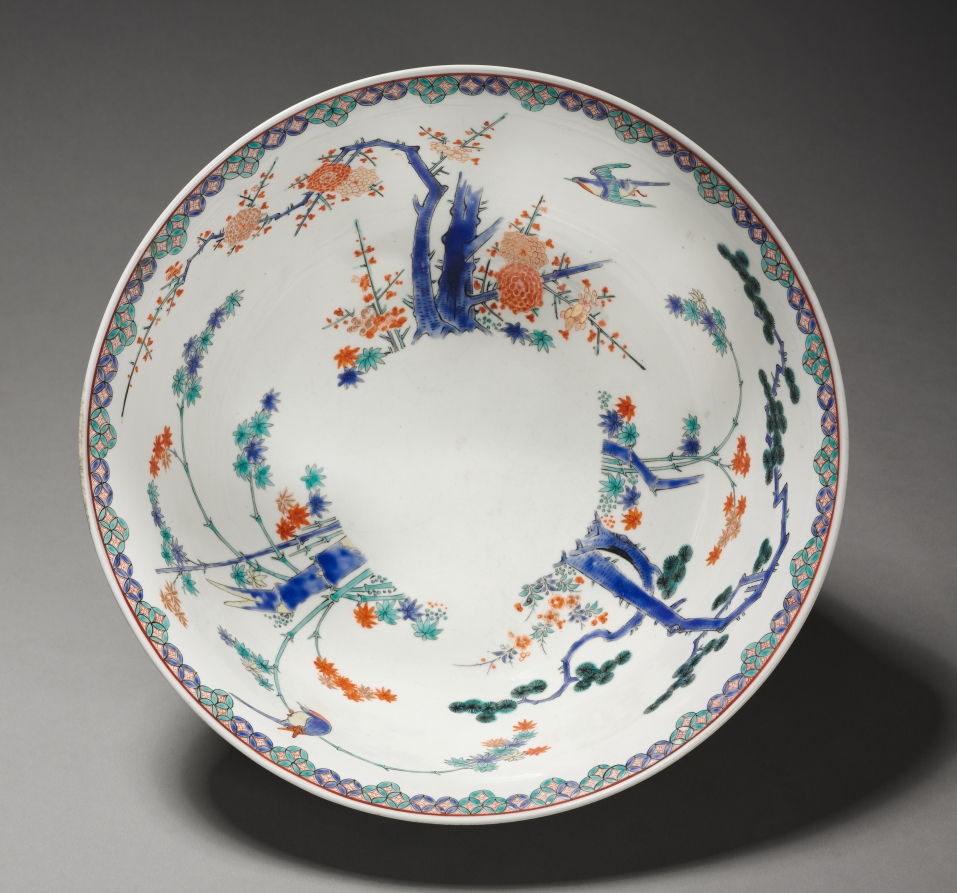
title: Bowl: Kakiemon Ware (1 of 2)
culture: Japan, Edo period (1615–1868)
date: late 1600s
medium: Imari ware porcelain with overglaze enamel and gold decoration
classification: Ceramic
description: The Chinese style of decoration identifies this bowl as a product made for the markets in England, Holland, France, and Germany. Here, kakiemon potters rearranged the Chinese literati motifs of the plum, pine, and bamboo. Such kakiemon ware inspired domestic porcelain production in Europe in the 1700s and 1800s.